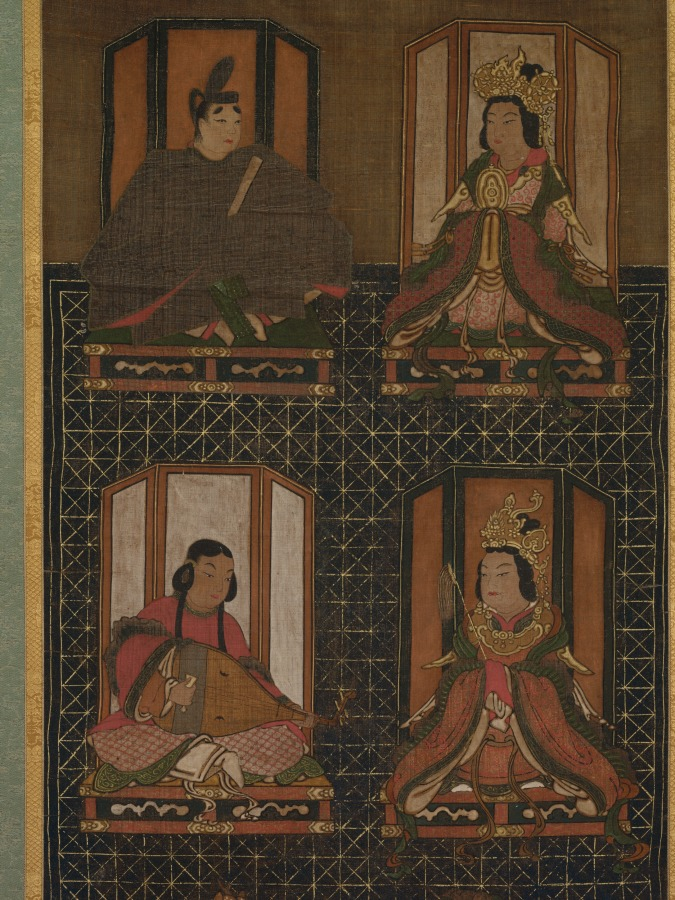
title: Mandala of the Four Deities of Mt. Kōya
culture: Japan, Muromachi period (1392–1573)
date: 1500s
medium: hanging scroll, ink, color and cut gold foil on silk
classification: Painting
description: The two kami, or deities, at the top of this painting are Kariba Myōjin and Niu Myōjin. They inhabit Mount Kōya and are described as son and mother. They are shown here as courtiers, with Kariba in Japanese-style court robes and Niu in robes modeled after court garments of the Tang dynasty. The two kami seated beneath are Kehi Myōjin, portrayed as a lady holding a whisk, and the youthful Miyajima Myōjin, with his hair drawn up in loops, playing a lute (biwa). Hōjō Masako (1157–1225), the wife of the first Kamakura shogun (leader) Minamoto Yoritomo (1147–1199), invited them to Mount Kōya.